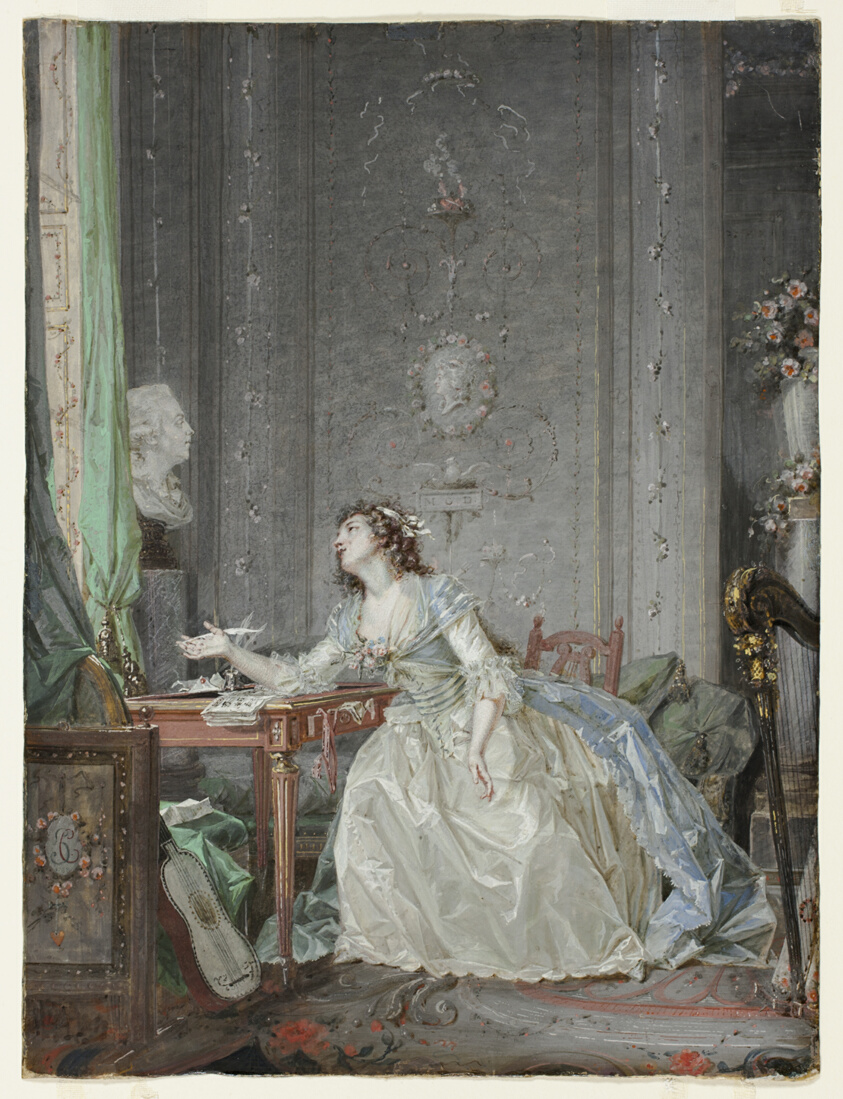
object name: Drawing and Watercolor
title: Interior with a Portrait of a Young Lady Before a Bust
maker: Claude Hoin; French, 1750-1817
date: 1788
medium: Gouache on vellum, laid down on cream laid paper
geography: France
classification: gouache; drawings (visual works); prints and drawing